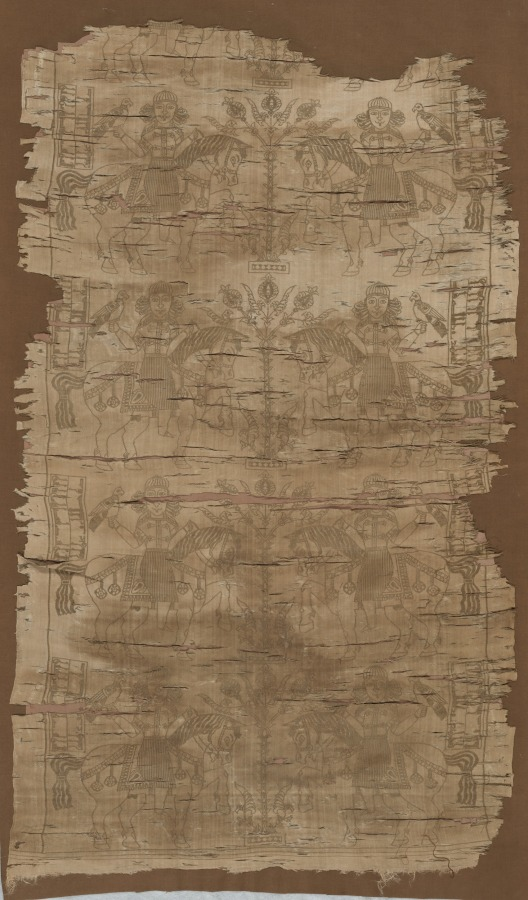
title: Panel with Falconers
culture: Iran, in the style of the Buyid period (945–1055)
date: 1516–1955 (radiocarbon date, 95% probability)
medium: Silk: lampas weave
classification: Textile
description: The panel preserves four vertical repeats of a tree flanked by falconers on confronted horses. Behind each falconer is an Arabic inscription. The design is delineated in dark brown against a tan ground.